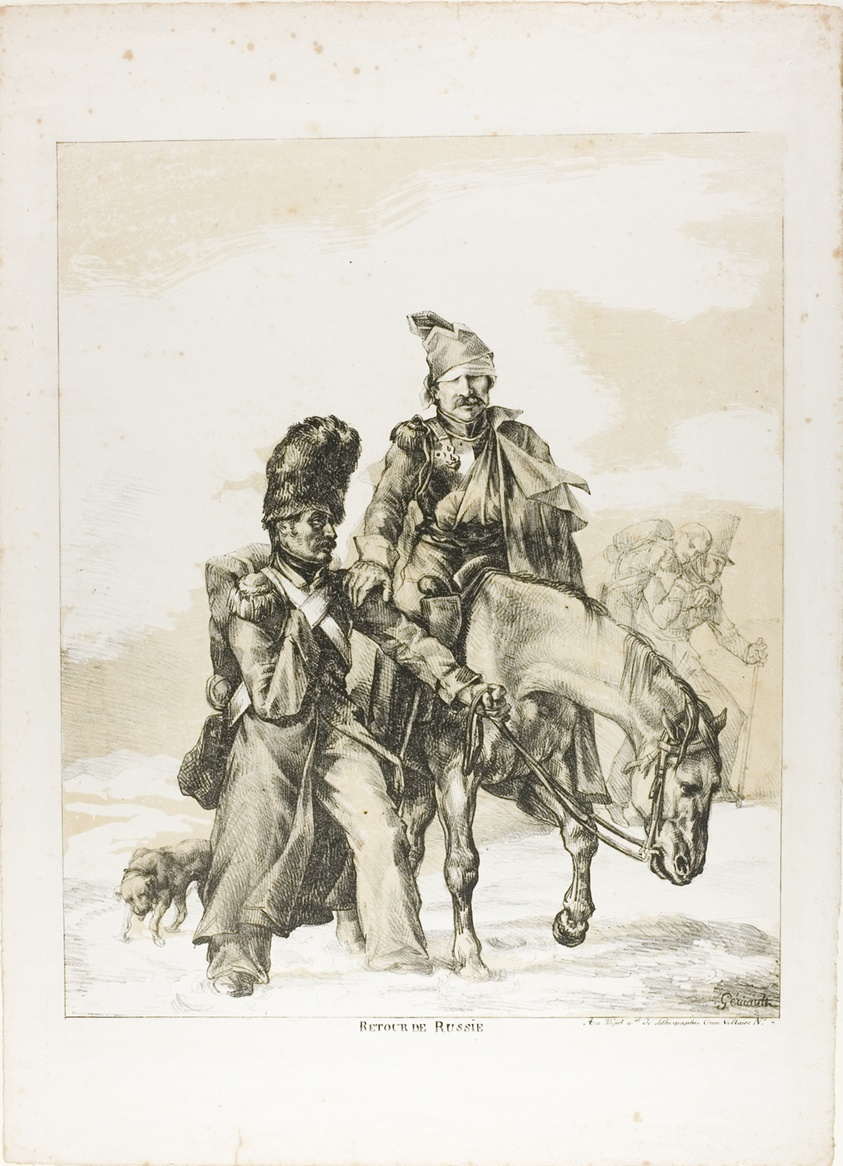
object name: Print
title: The Return from Russia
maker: Théodore Géricault; French, 1791-1824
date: 1818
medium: Lithograph in black with tan tint stone on ivory wove paper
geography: France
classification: lithograph; print; prints and drawing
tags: war